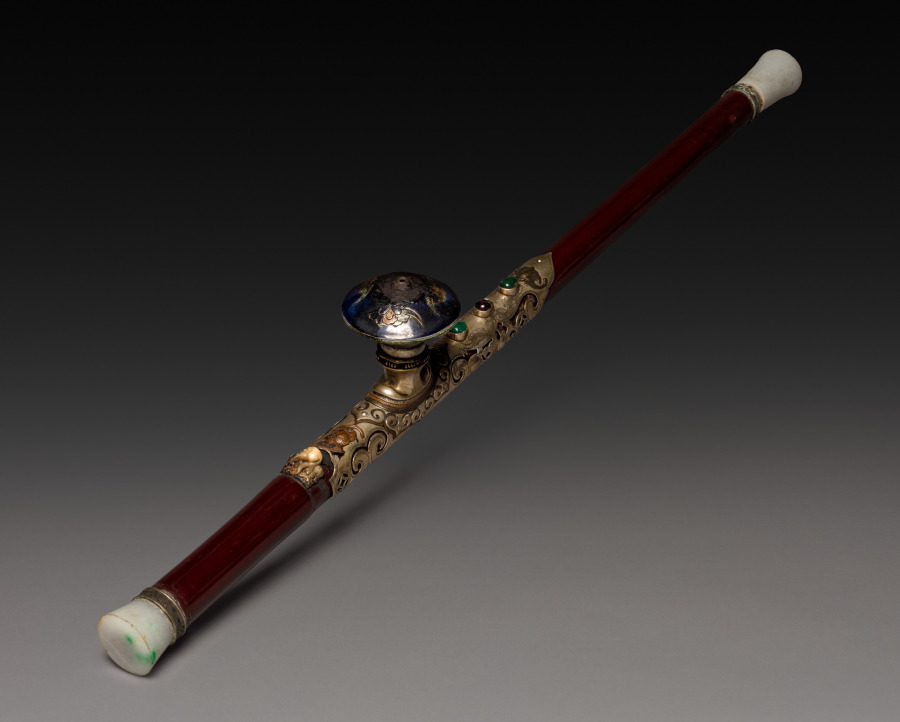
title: Opium Pipe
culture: China, Qing dynasty (1644-1911)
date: 1800s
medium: lacquer, jade, and silver decoration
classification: Miscellaneous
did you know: The aubergine pottery bowl is decorated with bats in orange and green glaze.